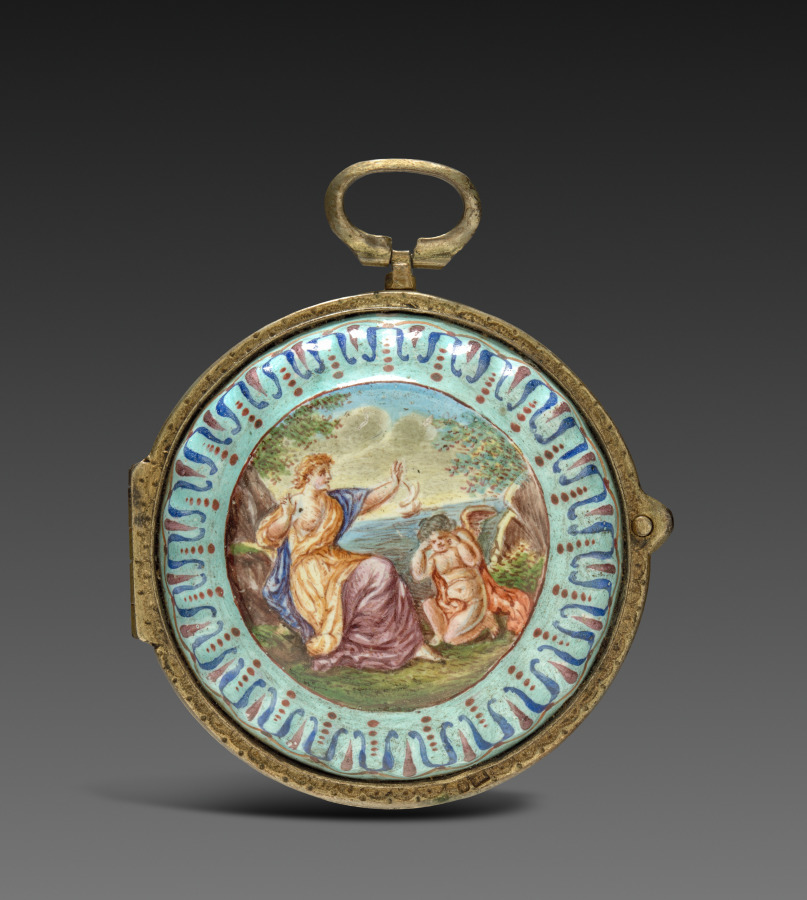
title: Watch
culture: France, Paris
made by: Marchand (French)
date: late 1700s - early 1800s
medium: enameled case mounted in engraved gilded metal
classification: Jewelry